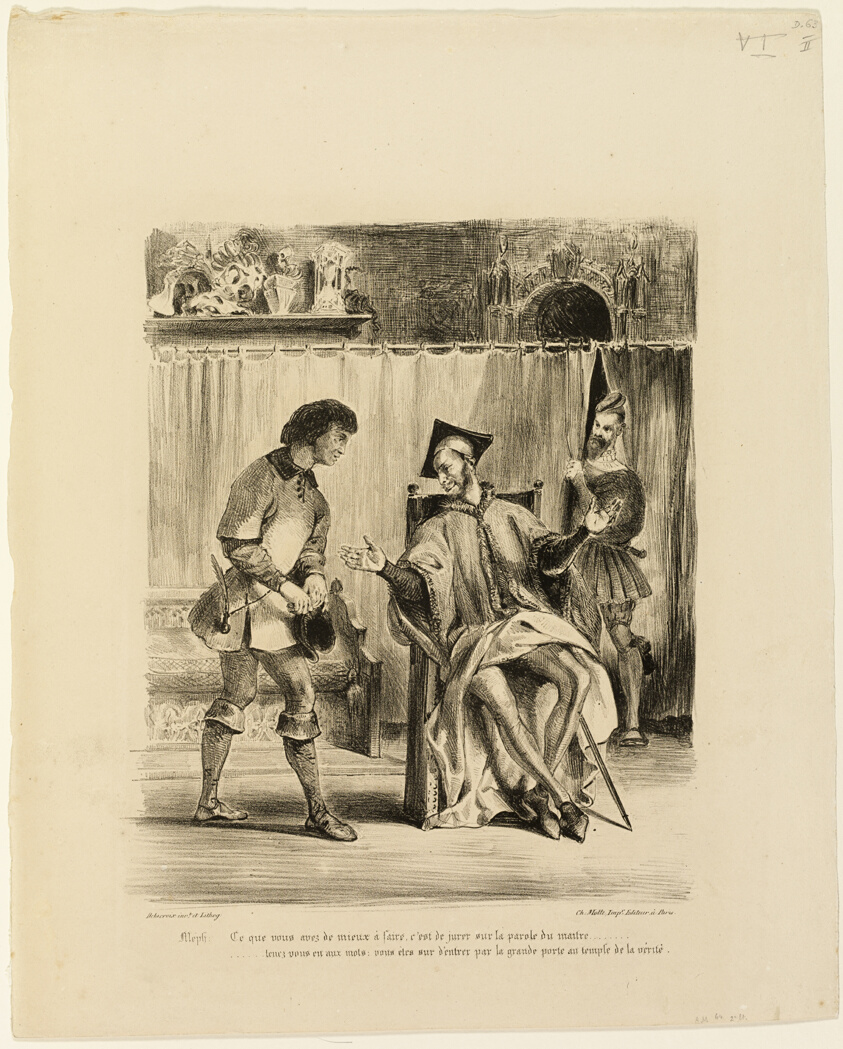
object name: Print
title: Mephistopheles Receiving the Student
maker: Eugène Delacroix (French, 1798-1863)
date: 1828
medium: Lithograph in black on ivory wove paper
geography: France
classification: lithograph; print; prints and drawing